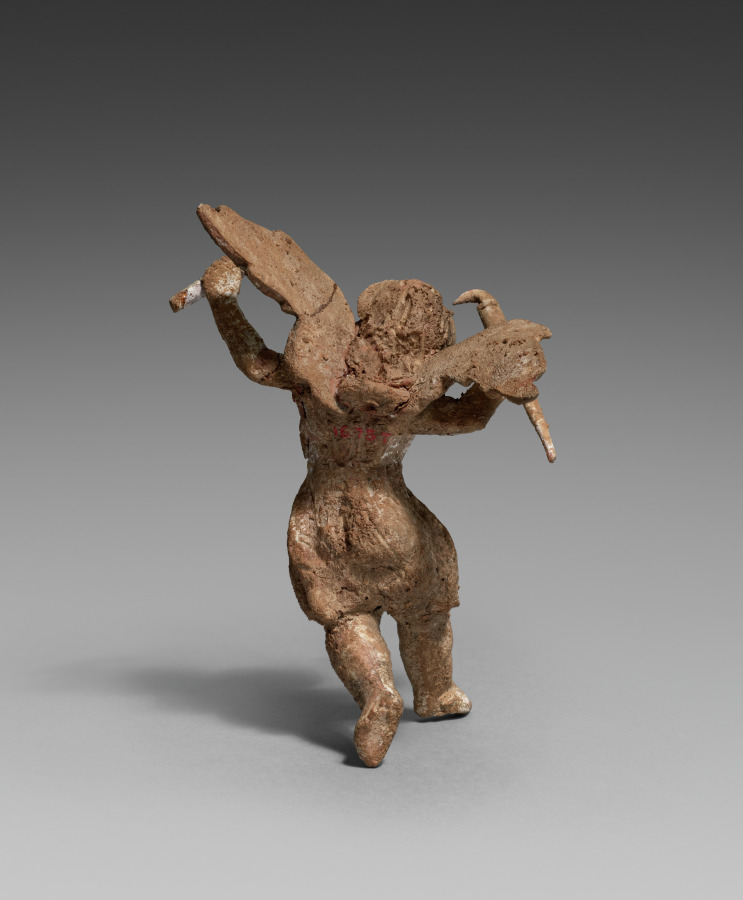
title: Figurine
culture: Greece, Myrina, Hellenistic Period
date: 300–100 BCE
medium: terracotta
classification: Sculpture